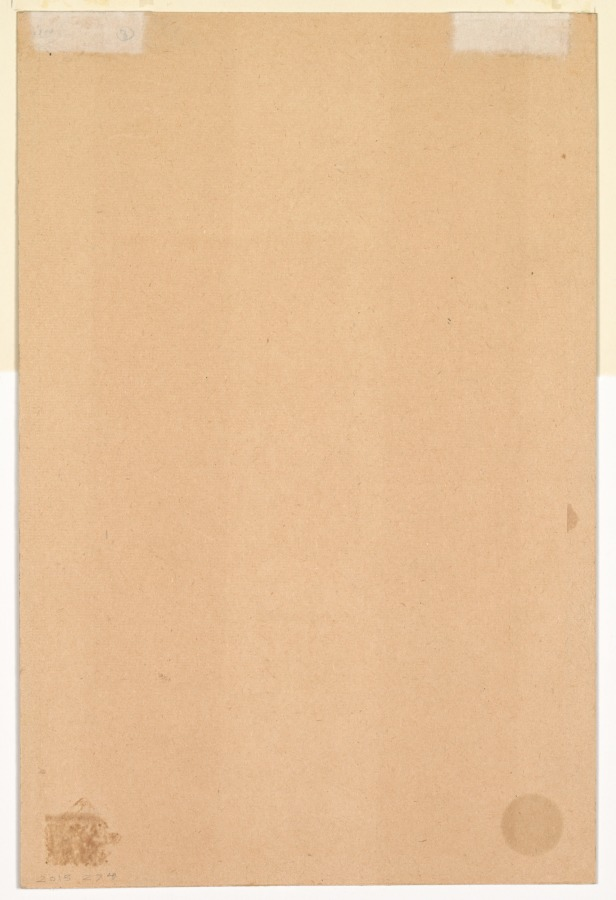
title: A Mughal courtier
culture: Mughal India, court of Akbar (reigned 1556–1605)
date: c. 1575; border added probably 1700s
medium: Gum tempera and gold on paper, mounted with gold-sprinkled borders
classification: Painting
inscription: Inscription in top margin, upside-down in nasta‘liq script, probably added c. 1700s: Sarkhod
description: This sensitive portrait is among the earliest surviving individual portraits from the Mughal atelier. He remains unidentified by inscription, since such portraits were made for the emperor Akbar who was unable to read. Realism in portraiture developed under Akbar as a means of keeping records of gifts and promotions without written notations. The figure conspicuously grasps the maroon and gold scarf in his left hand, which suggests that it may have been the gift from the emperor that would have occasioned the portrait. The array of blades he carries indicates that he was conscripted into military service at the Mughal court.